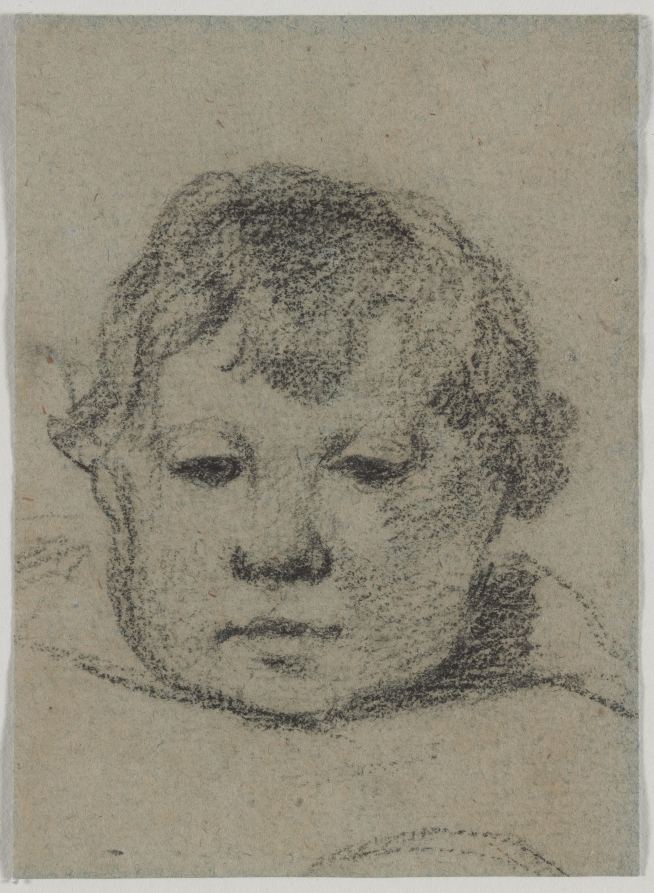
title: Emil Gauguin as a Child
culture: France, 19th century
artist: Paul Gauguin (French, 1848–1903)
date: c. 1875–1876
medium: black crayon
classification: Drawing